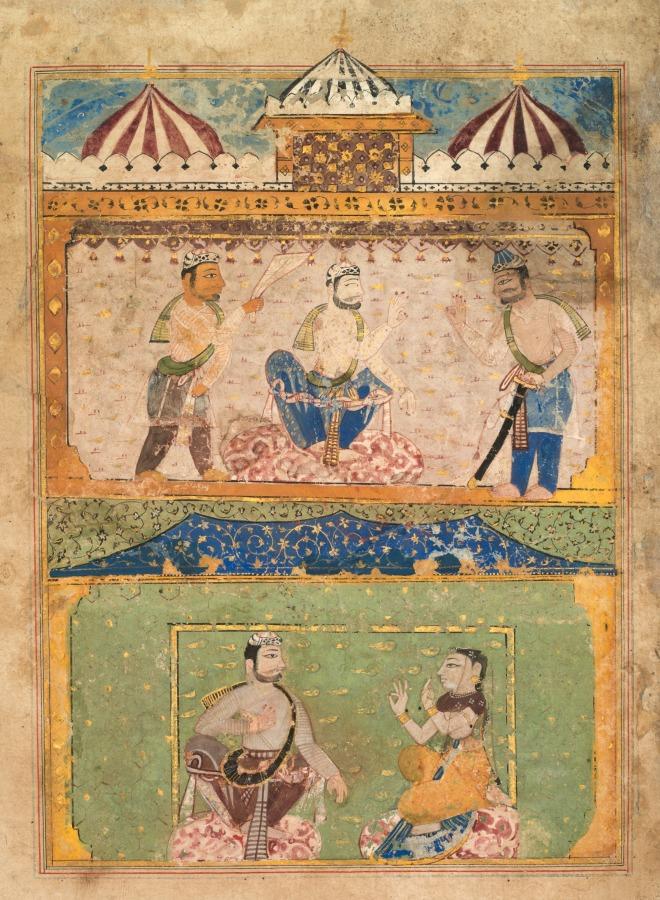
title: A traveler persuades Lorik to return home (top); Chanda objects (bottom), from a Chandayana (Story of Chanda)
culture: Sultanate India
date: c. 1540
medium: gum tempera, ink, and gold on paper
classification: Painting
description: Chanda is the heroine of a Sufi romance. The Sufis are a mystical branch of Islam whose followers cultivate love for the divine. This painting is from a dispersed manuscript of the Chandayana painted in a style that was an important source for Mughal painting. Its artists integrated Persian colors and delicate vine motifs with figures presented in profile, within flat, compartmentalized registers, which are horizontal divisions of space. The drama of their interactions is conveyed by means of animated gestures.